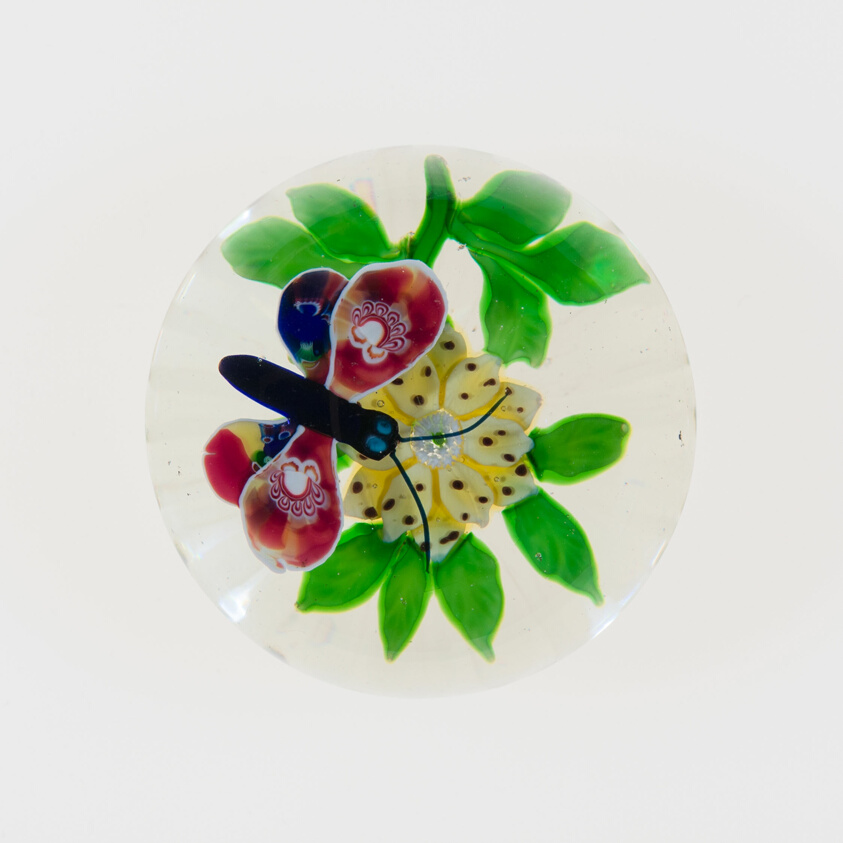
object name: Glass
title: Paperweight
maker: Baccarat Glassworks (Cristalleries de Baccarat); Lorraine, France, founded 1764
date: c. 1848–55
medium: Glass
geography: Lunéville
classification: paperweight; lampwork; european decorative arts; glass